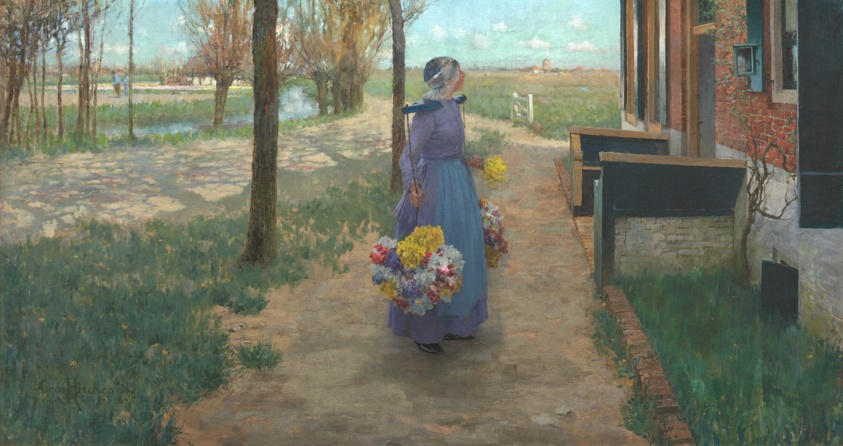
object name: Painting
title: Flower Girl in Holland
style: Impressionism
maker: George Hitchcock (American, 1850–1913)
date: 1887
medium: Oil on canvas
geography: Holland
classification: painting; american arts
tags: landscapes, countryside, women, flowers, Holland, Chicago